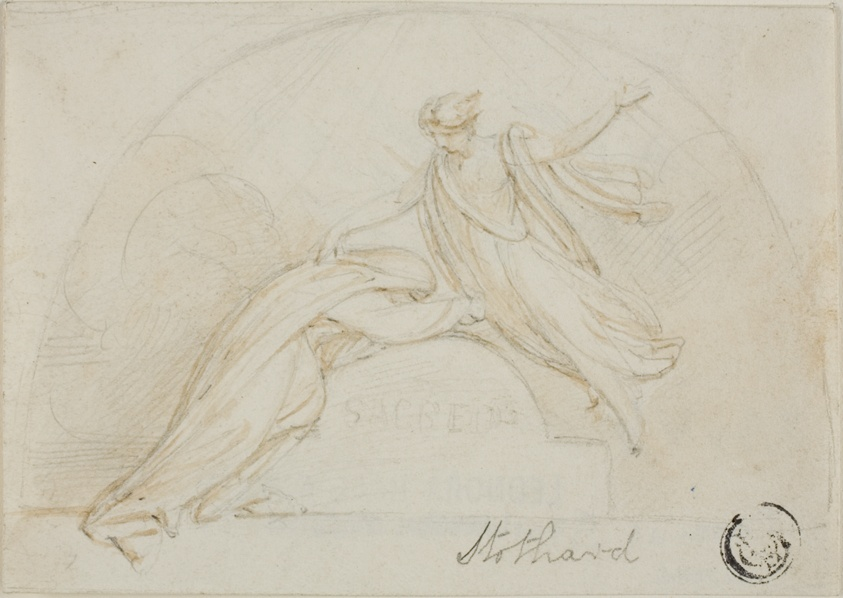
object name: Drawing and Watercolor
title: Design for Funerary Monument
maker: Attributed to John Flaxman, II; English, 1755-1826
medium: Graphite with brush and brown ink on ivory wove paper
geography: England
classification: pen and ink drawings; drawings (visual works); prints and drawing